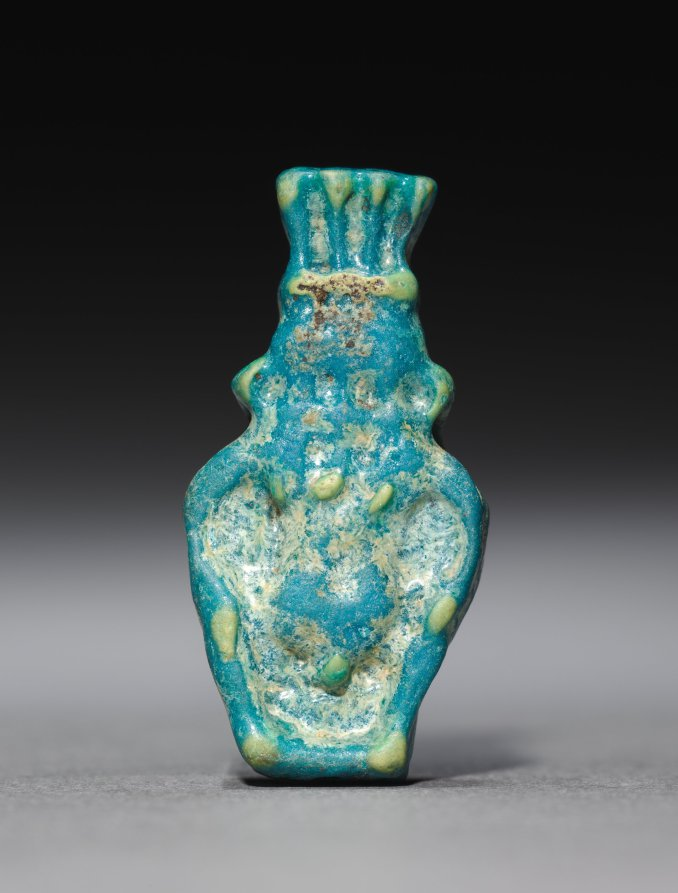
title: Amulet of Bes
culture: Egypt, Greco-Roman period (332 BCE–395 CE), Roman empire (30 BCE–395 CE)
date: 30 BCE–395 CE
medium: polychrome faience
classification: Amulets